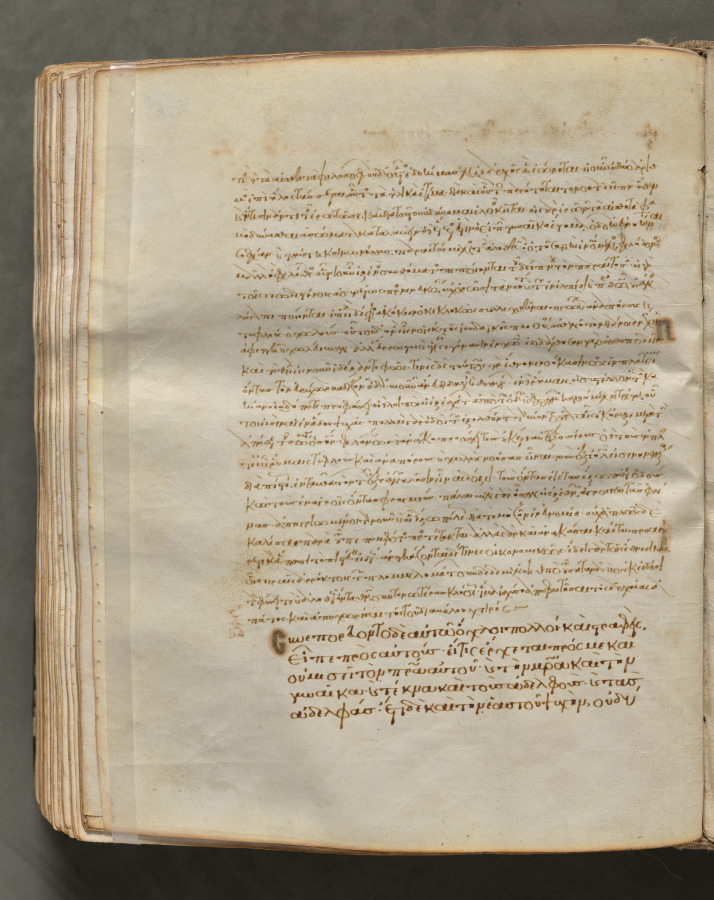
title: Text, folio 278 (verso), from a Gospel Book with Commentaries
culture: Byzantium, Constantinople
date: c. 1000–1100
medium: ink, tempera, and gold on vellum; leather binding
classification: Bound Volume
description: Each of the four gospels in this book opens on a page with brilliantly illuminated borders depicting the author of the text as well as birds—principally peacocks, symbols of the immortality of the soul—and fountains, representing the fountain of life and the salvation of the soul. This volume consists of 428 leaves with texts in Greek. Its level of sophistication suggests that it was probably written and decorated in a monastery in Constantinople.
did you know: Gospel books were carried in procession through Byzantine churches.